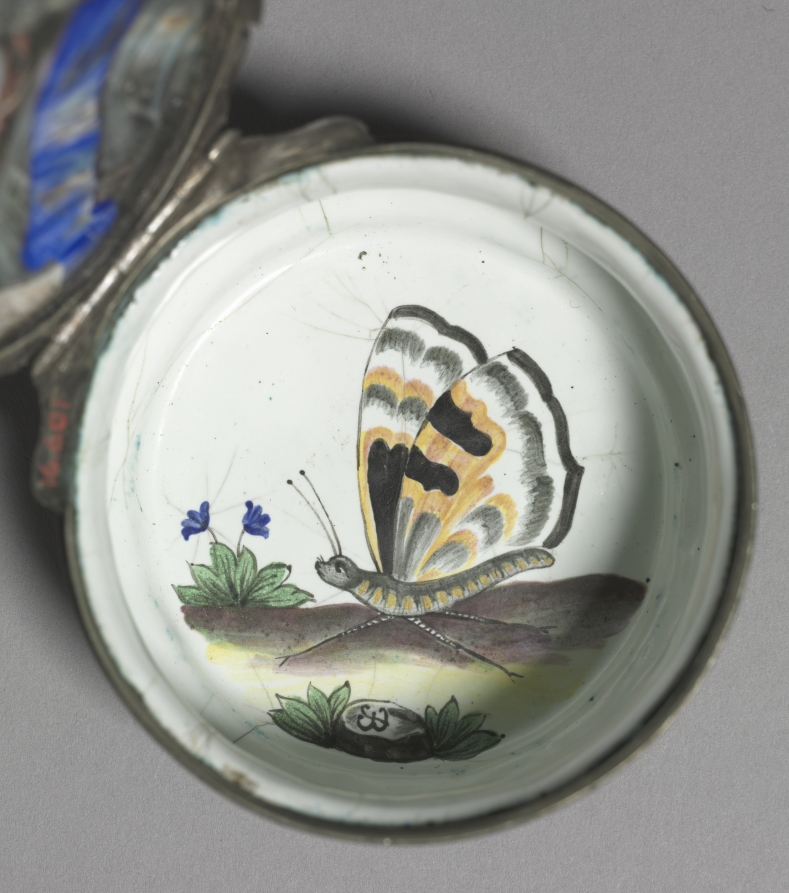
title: Box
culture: Italy or Germany, 18th century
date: 1700s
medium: enamel on copper, metal mounts with traces of gilding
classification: Miscellaneous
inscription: inside box appear the letters "FB" in monogram.